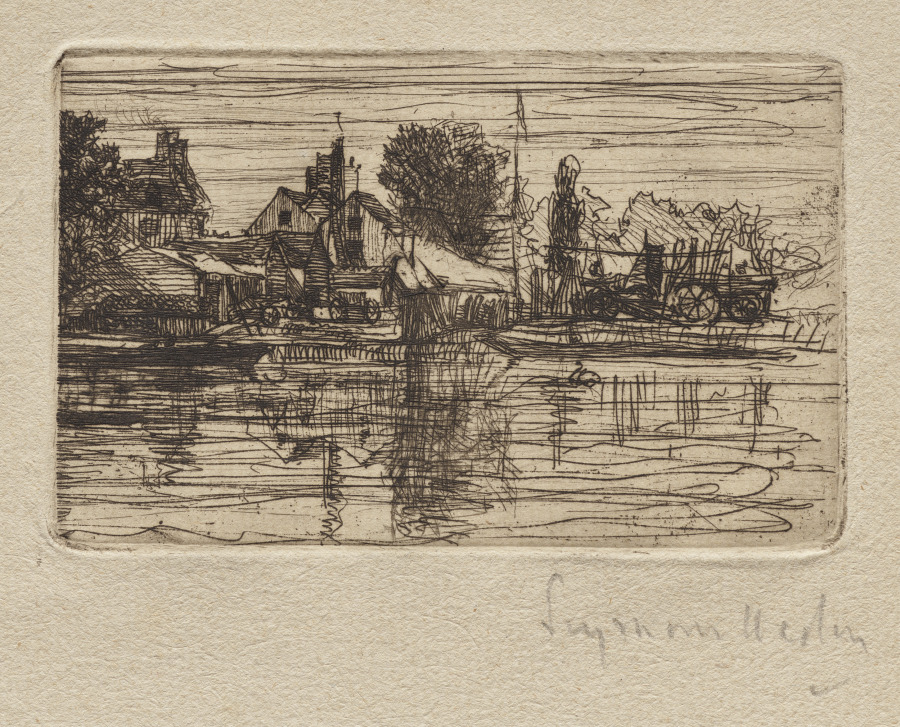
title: Thames Side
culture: England, 19th century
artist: Francis Seymour Haden (British, 1818–1910)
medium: etching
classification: Print